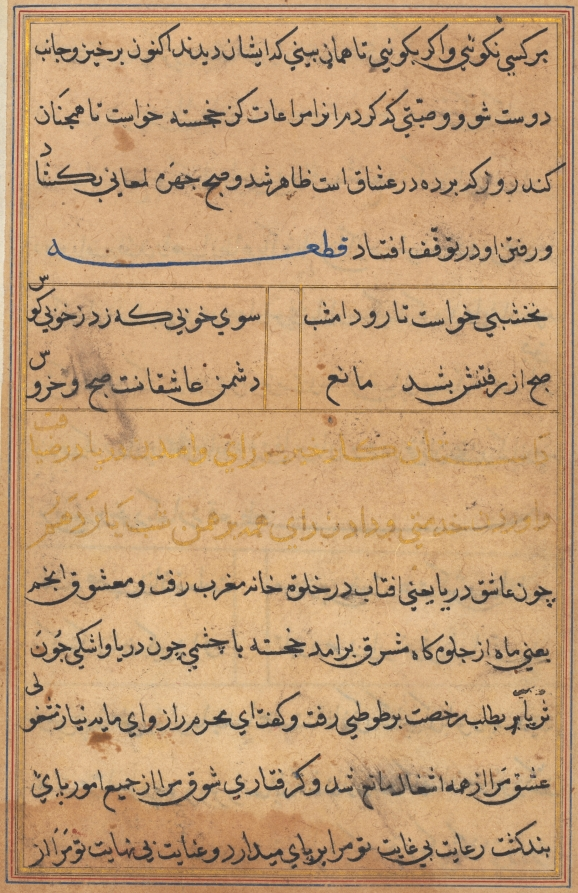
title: Page from Tales of a Parrot (Tuti-nama): text page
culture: Mughal India, court of Akbar (reigned 1556–1605)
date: c. 1560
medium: gum tempera, ink, and gold on paper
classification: Painting